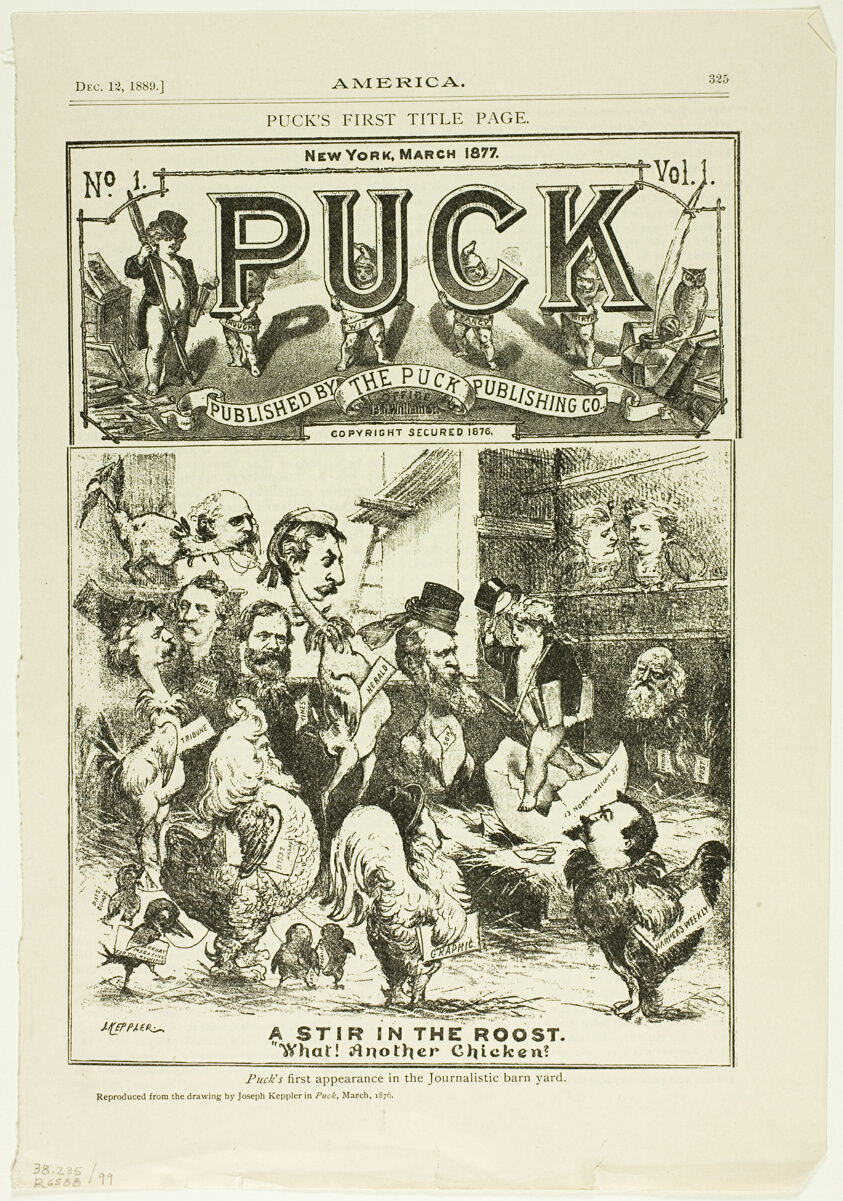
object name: Print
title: A Stir in the Roost, from America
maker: Joseph Keppler (American, 1638-1894)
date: published December 12, 1889, originally published in Puck on March 18, 1876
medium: Lithograph on newsprint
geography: United States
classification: lithograph; print; prints and drawing